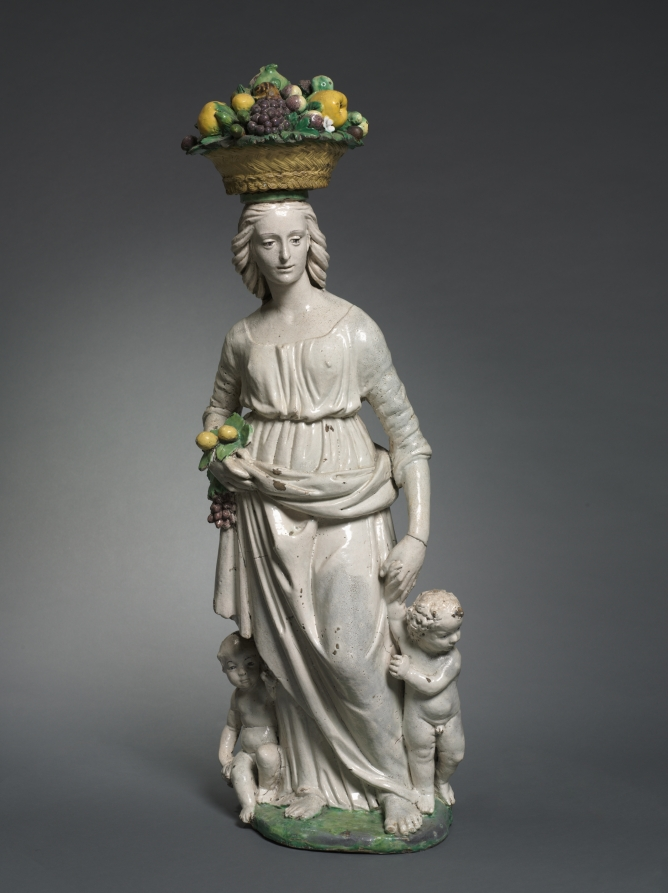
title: Dovizia (Plenty)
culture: Italy, Florence, 16th century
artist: Giovanni della Robbia (Italian, 1469–1529/30)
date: c. 1520–29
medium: glazed terracotta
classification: Sculpture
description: Many elite Florentine Renaissance homes had sculptures of idealized young women carrying nature’s bounty, such as this work. The motif stems from a statue by Donatello (about 1386–1466) that towered over Florence’s main public market. At home, however, the sculpture became a talisman for the family’s well-being. The city-state’s low birth rate was a serious political matter, and such a sculpture was believed to stimulate fertility while also promoting motherhood and bolstering financial success.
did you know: Inspired by an over life-sized, public sculpture by Donatello, Giovanni della Robbia reduced the figure for a domestic setting.